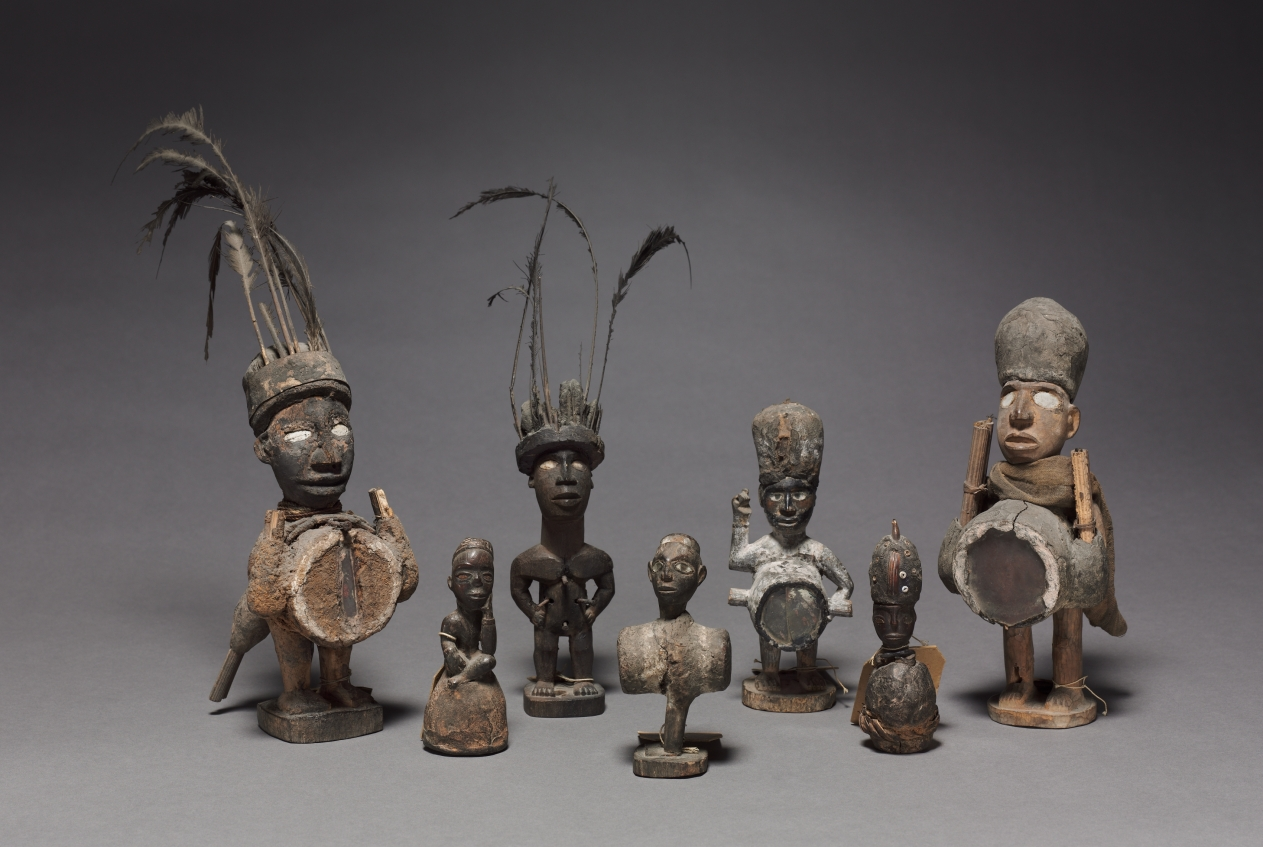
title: Power figure (nkisi)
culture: Africa, Central Africa, Republic of the Congo, Kongo-style maker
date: late 1800s-early 1900s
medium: Wood, organic materials (including resin), and metalized glass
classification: Sculpture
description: One of seven anthropomorphic figurines, these minkisi contained medicines in which an ancestral spirit was believed to reside. The medicines served a metaphorical rather than literal purpose in the resolution of conflicts among Kongo people. This figure contained white- and red-colored medicine loads on its belly and back. Its pose may refer to the nkisi’s capacity to see more than others.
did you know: The nduda minkisi were loaded with gunpowder and/or medicine to protect their owners and to shoot “witches” and other enemies.